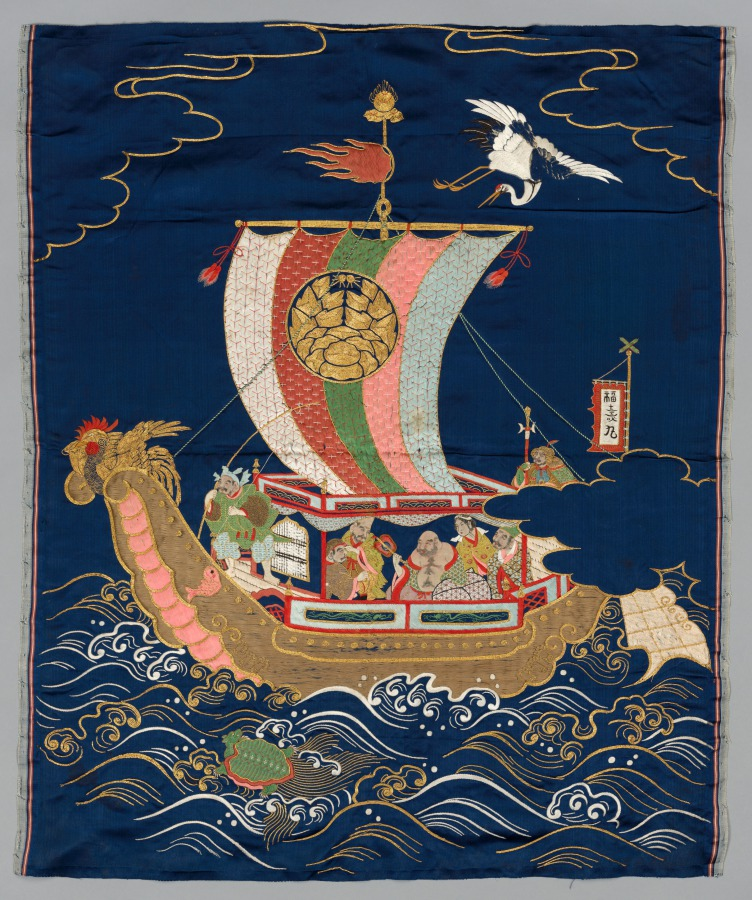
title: Embroidered Fukusa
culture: Japan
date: late 1800s-early 1900s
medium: embroidered silk with metal thread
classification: Embroidery